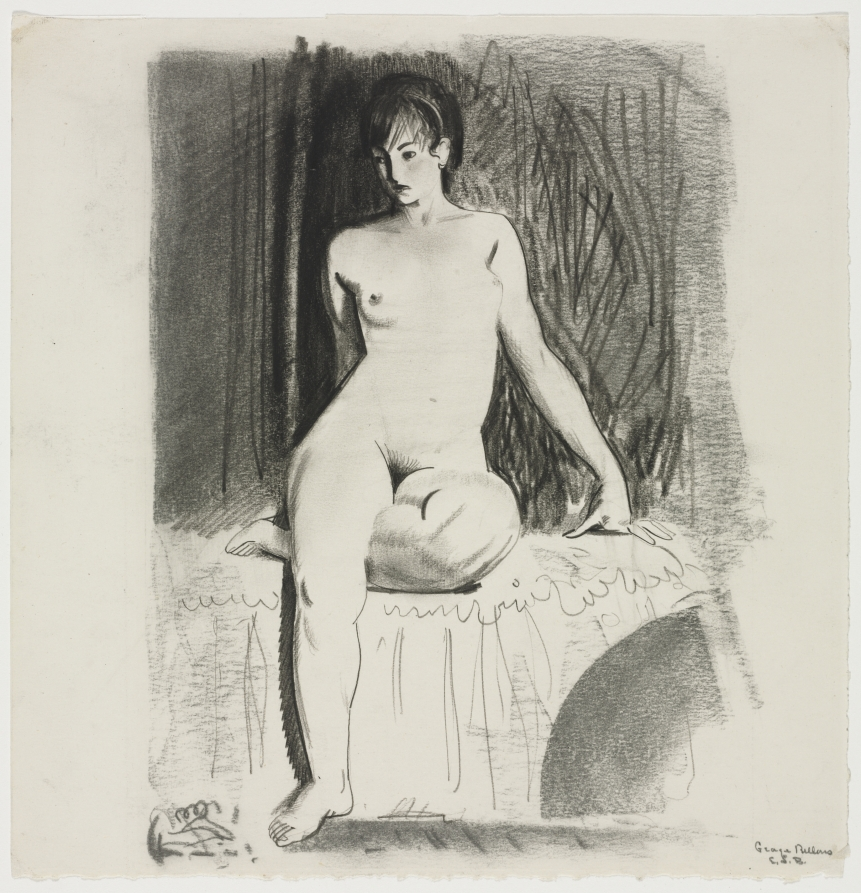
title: Seated Female Nude (Emma Story Bellows)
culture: America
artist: George Bellows (American, 1882–1925)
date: after 1910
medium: black lithographic crayon with traces of stylus (above head)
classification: Drawing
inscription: signed, lower right, in graphite: George Bellows / E. S. B.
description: Bellows achieved fame as a young man for his powerful boxing scenes and images of urban life, but he also produced sensitive drawings and paintings of women. Bellows married Emma Story in 1910.